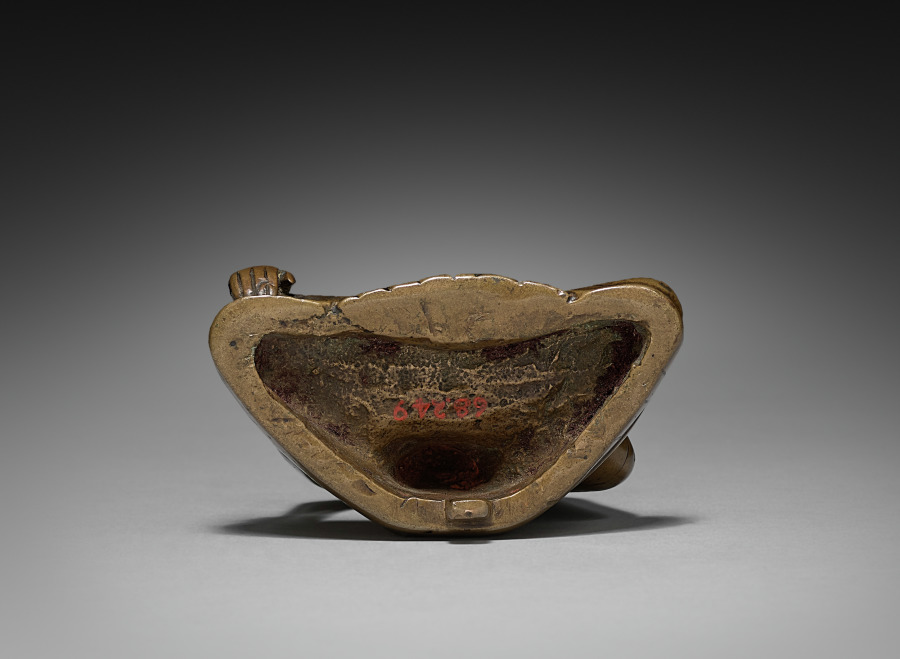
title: Seated Buddha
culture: India, Bengal(?), Pala period, 9th century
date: 800s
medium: bronze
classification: Sculpture